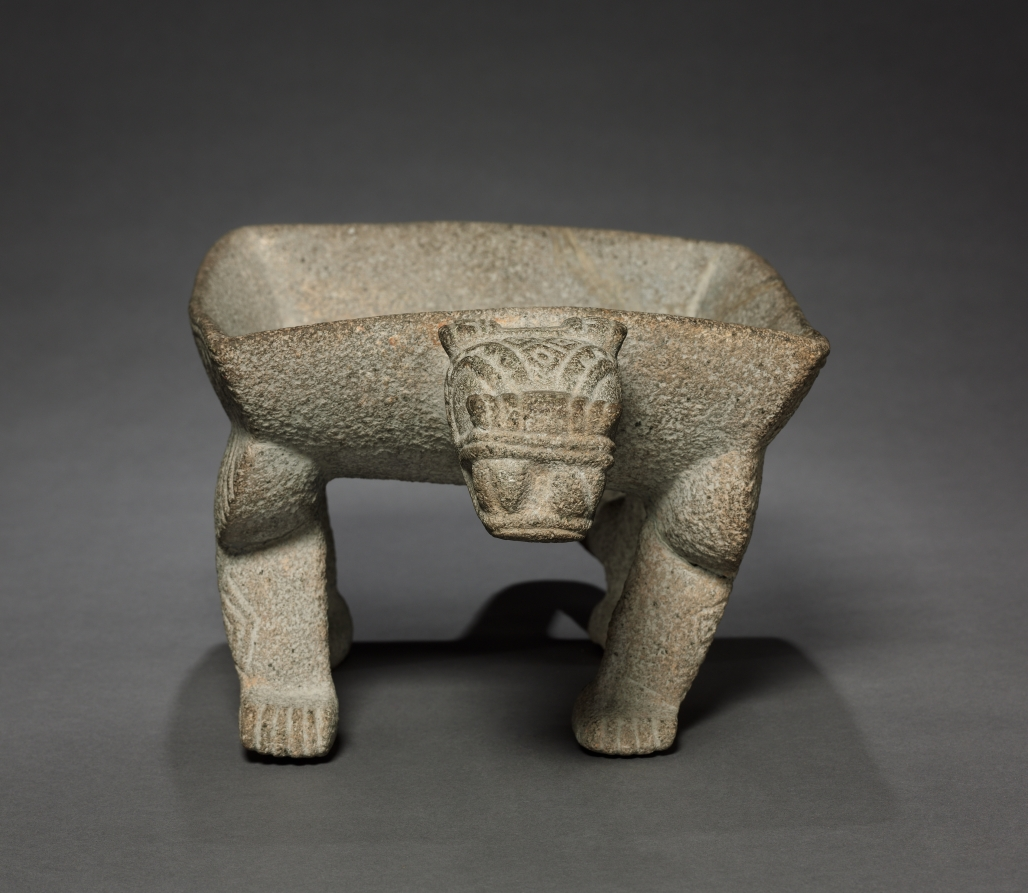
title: Jaguar Grinding Stone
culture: Costa Rica, Atlantic Watershed region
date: c. 1000–1550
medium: stone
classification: Sculpture